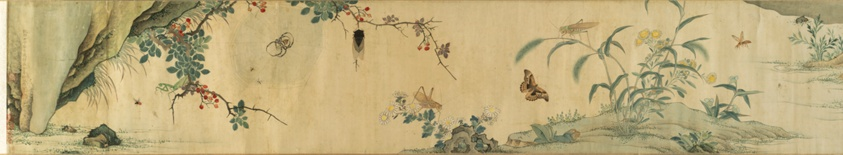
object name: Painting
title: Flowers and Insects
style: Chinese (culture or style)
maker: Chai Zhenyi 柴貞儀 and Chai Jingyi 柴靜儀; Chinese, 17th century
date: Qing dynasty (1644–1911), reign of Kangxi (1662–1722)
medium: Handscroll; ink and color on paper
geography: China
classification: handscroll; painting; asian art